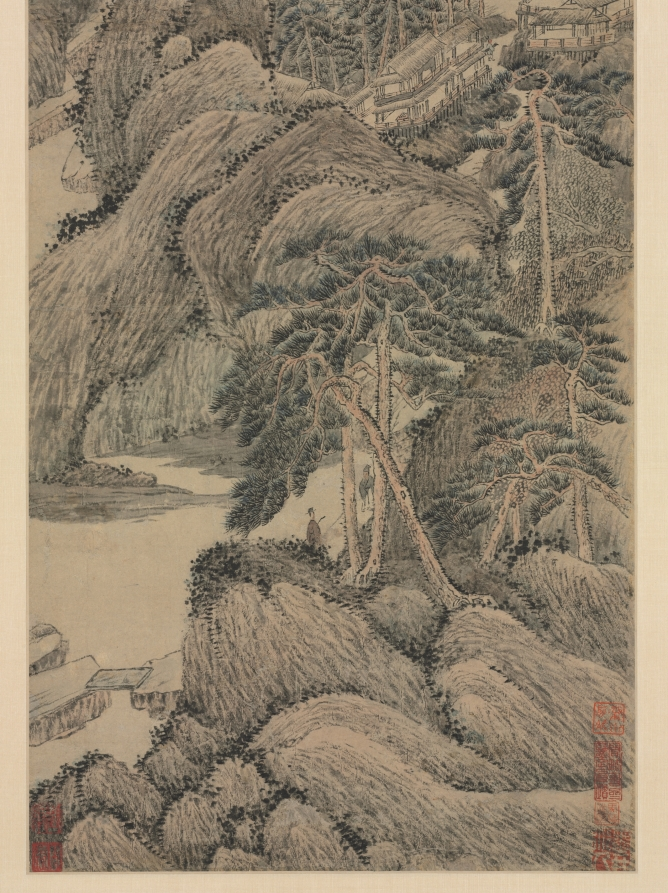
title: Pine Wind from Myriad Villages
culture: China, Qing dynasty (1644-1911)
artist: Wu Li (Chinese, 1632–1718)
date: late 1600s–1718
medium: Hanging scroll; ink and light color on paper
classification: Painting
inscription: Artist's title, signature, and 2 seals: Pine Wind from Myriad Valleys. Mojing daoren Wu Li.[seals] Mojing daoren; Wu Li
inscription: 5 additional seals: 2 of Fang Guancheng 方觀承 (1698–1768); 1 of Ma Chi-tso (1900s); 2 unidentified.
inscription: Two seals of the Qianlong emperor [r. 1736–95], probably authentic, were believed spurious and removed by a previous owner.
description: Wu Li, a native of Jiangsu province, was a talented painter, poet, and calligrapher. He studied painting with Wang Jian (1598–1677) and Wang Shimin (1592–1680), two of the “Four Wangs,” leaders of the Orthodox school of painting in the early Qing period. Through them, he also absorbed styles of earlier Ming dynasty masters. Wu was highly praised by his contemporaries and his paintings were in demand, but his interest in philosophy and religion curtailed his painting activities later in life. Wu Li converted to Christianity and in 1688 was ordained as one of the first 3 Chinese Jesuit priests. He spent the final 30 years of his life primarily in missionary work with the poor. Although this painting is undated, the sooty blackness of the ink tones and the easy self-confidence with which they are set down on paper echo recognized late works.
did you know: A figure carrying a qin, zither, walks between the buildings, perhaps intending to play music for the two men seated beneath the pines.